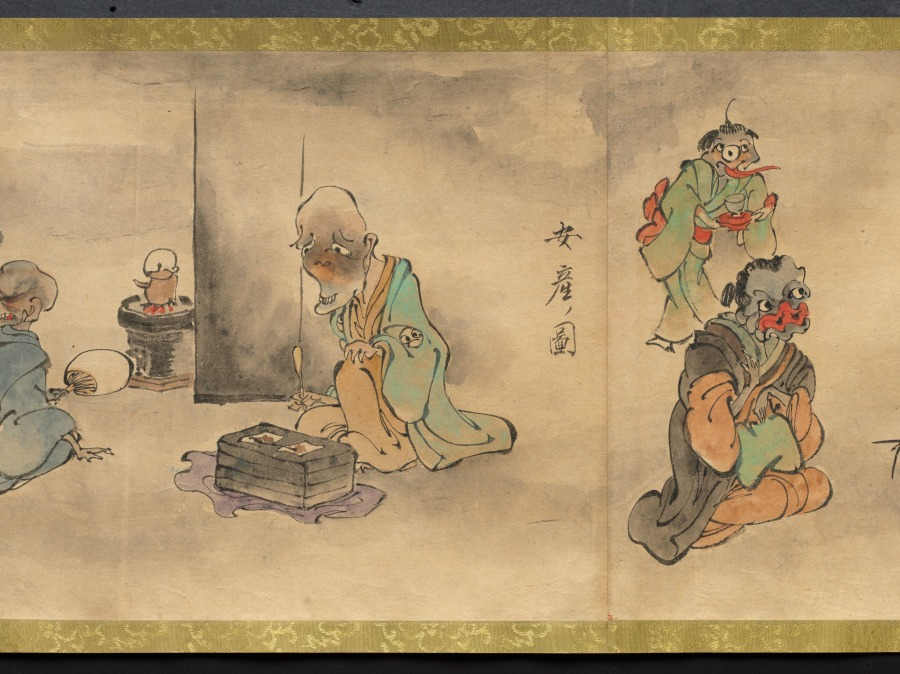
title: An Illustrated Marriage of Apparitions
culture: Japan, Edo period (1615–1868)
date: mid-1800s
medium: handscroll; ink and color on paper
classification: Painting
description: The matchmaking, engagement, wedding, and birth of the first child of two apparitions, or bakemono, literally "things that change," are illustrated in this whimsical, humorous handscroll. Japanese folklore abounds with such strange creatures, most famously represented in handscrolls featuring a procession of 100 supernatural monsters. Aside from a textual preface and cartouches indicating the content of the scenes, the tale is told visually. The artist and whereabouts of the original handscroll are unknown, but a number of other 19th-century copies by amateur painters exist in Japanese collections, attesting to its broad appeal.